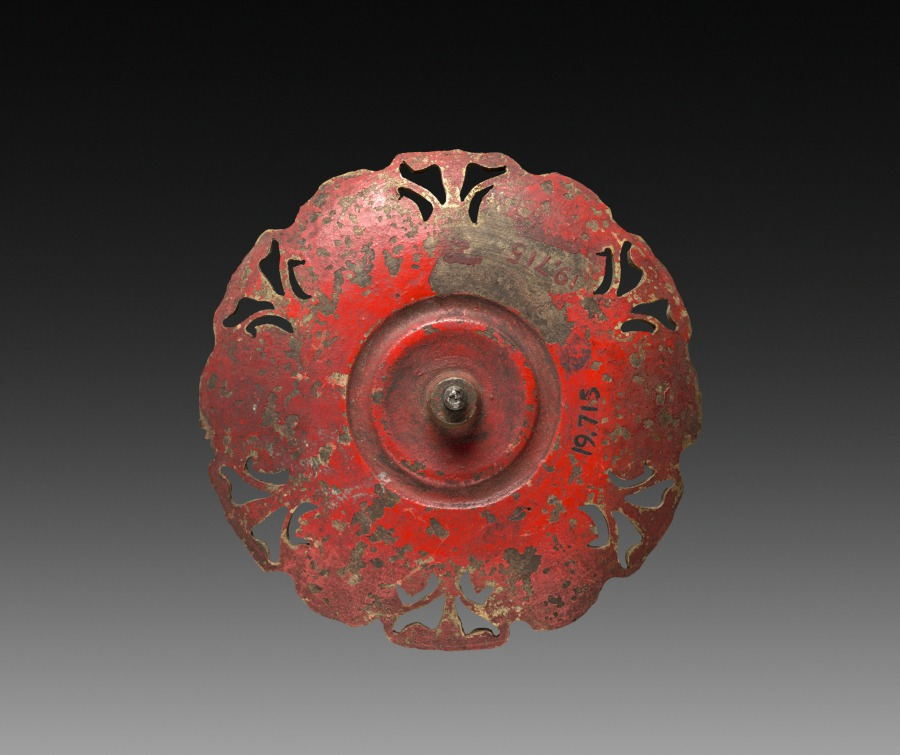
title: Ornamental Detail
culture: France, 18th century, Period of Louis XVI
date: 1775–1799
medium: gilt bronze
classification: Metalwork